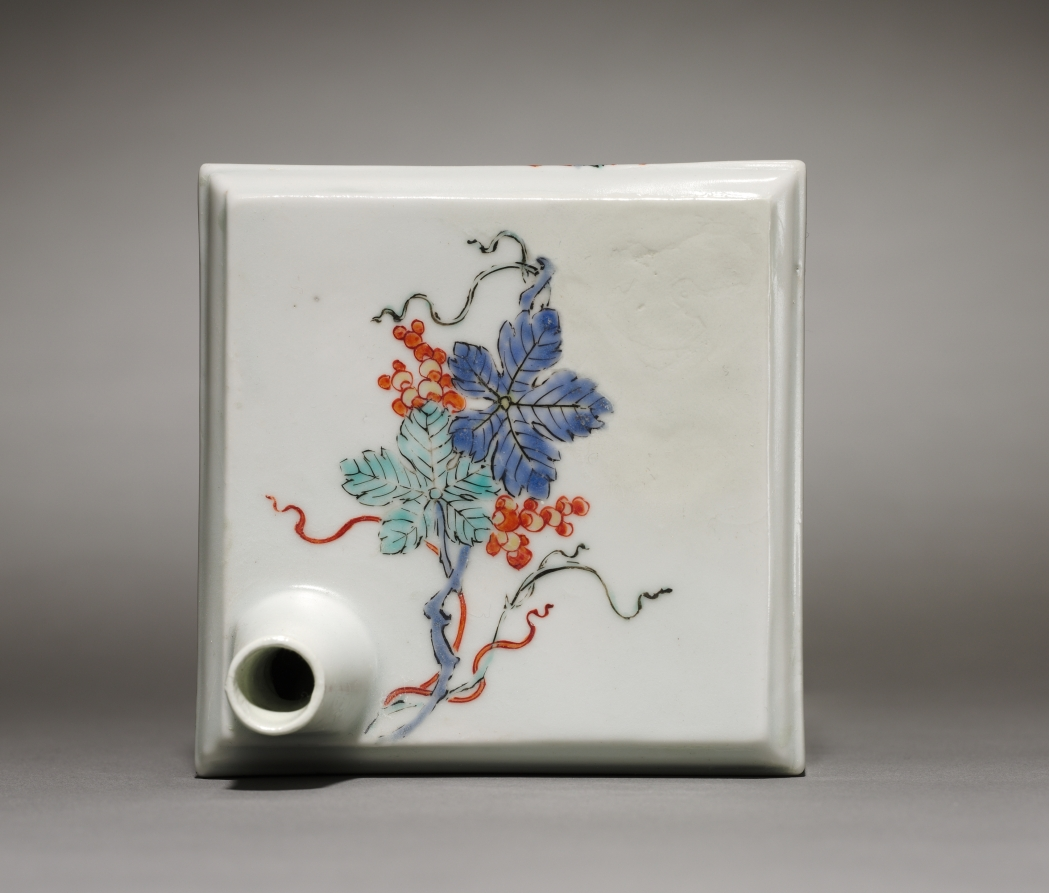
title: Square Bottle with Squirrel and Grapes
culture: Japan, Edo period (1615–1868)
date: late 1600s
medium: porcelain with overglaze color enamel (possibly Hizen ware, Kakiemon type)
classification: Ceramic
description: In the 1600s, Korean and Japanese elites could enjoy wine from Europe. In his 1636 travel diary called Haecharok, Kim Seryeom, a vice director of Korean envoys to Japan, recorded that the head of Japan’s Tsusima Island treated him to Western red wine. Therefore, export porcelain ware like Square Bottle with Squirrel and Grapes could have been made as a wine bottle.